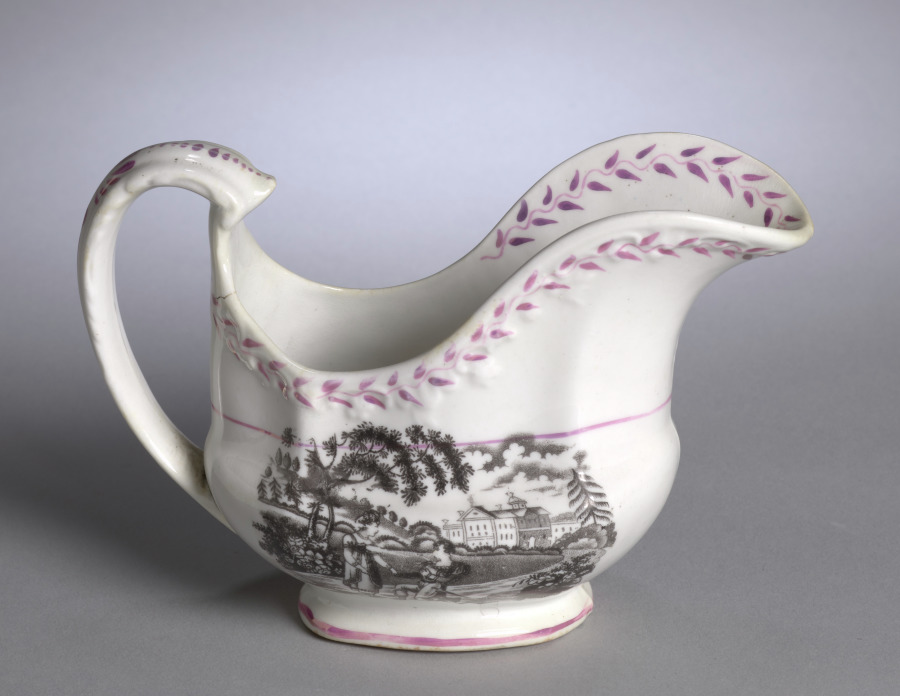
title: Cream Pitcher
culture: England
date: c. 1800–1825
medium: earthenware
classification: Ceramic